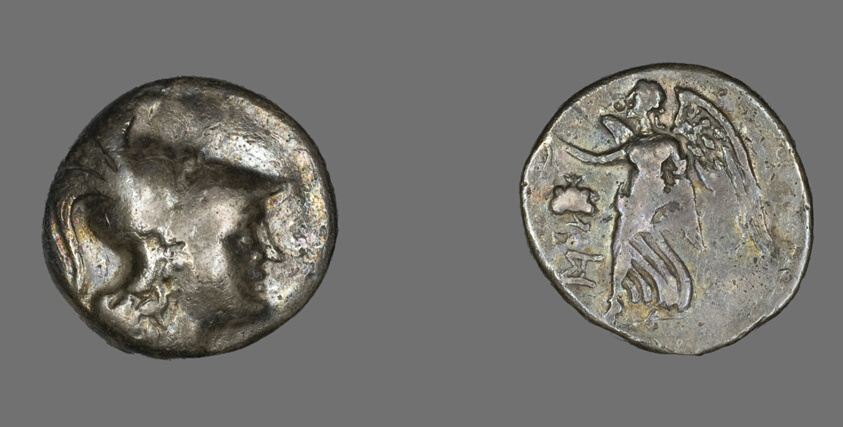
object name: Coin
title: Tetradrachm (Coin) Depicting the Goddess Athena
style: roman (ancient, style or period), ancient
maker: Roman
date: 190-36 BCE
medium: Silver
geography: Roman Empire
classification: coin; ancient art